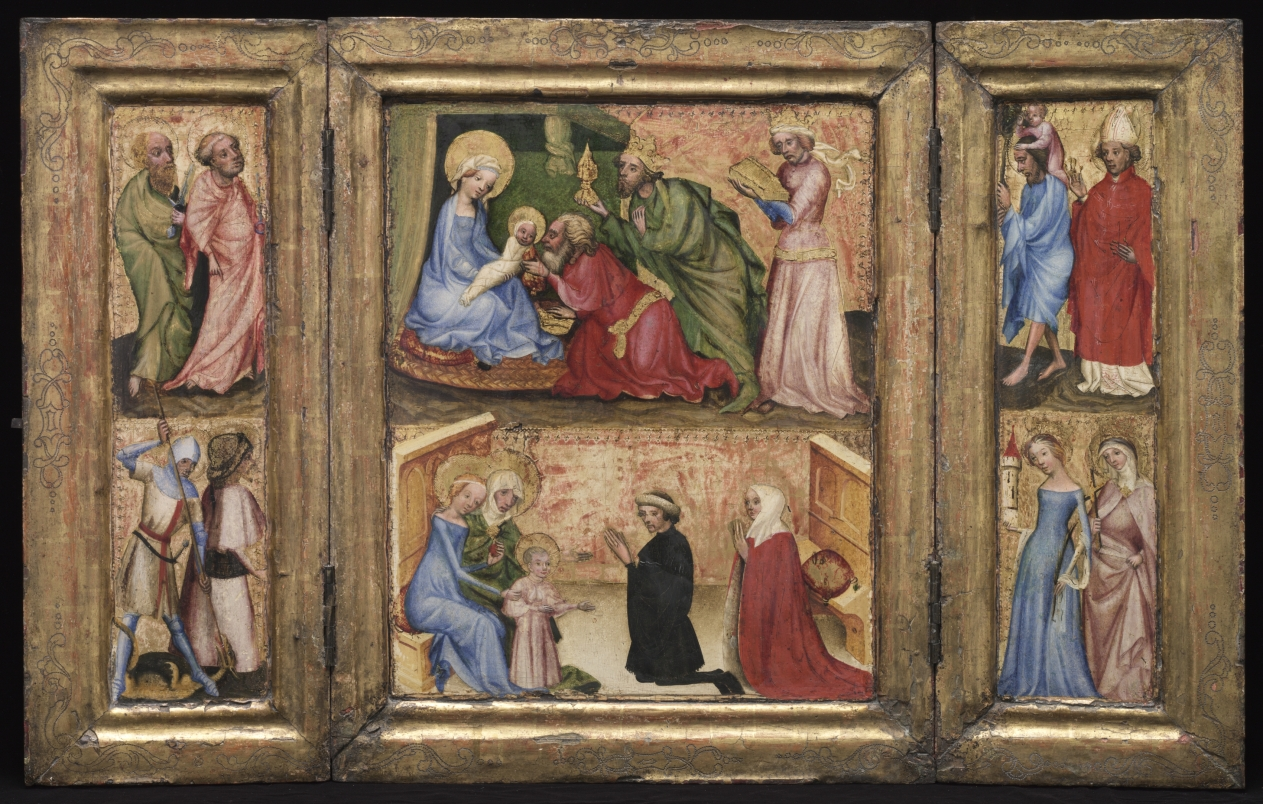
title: Triptych with the Adoration of the Magi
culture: Austria, Salzburg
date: c. 1424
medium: tempera and gold on wood (oak)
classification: Painting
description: This small winged altarpiece, called a triptych, was undoubtedly made for private use. The donor and his wife are shown in the lower central scene kneeling before the Virgin, her mother Saint Anne, and the Christ Child. Above is the Epiphany with the Three Kings presenting gifts to a tightly swaddled Christ.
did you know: On the outer wings moving clockwise are Saints Peter and Paul, Saints Christopher and Erasmus, Saint Barbara and a holy nun, and Saints George and James Major.